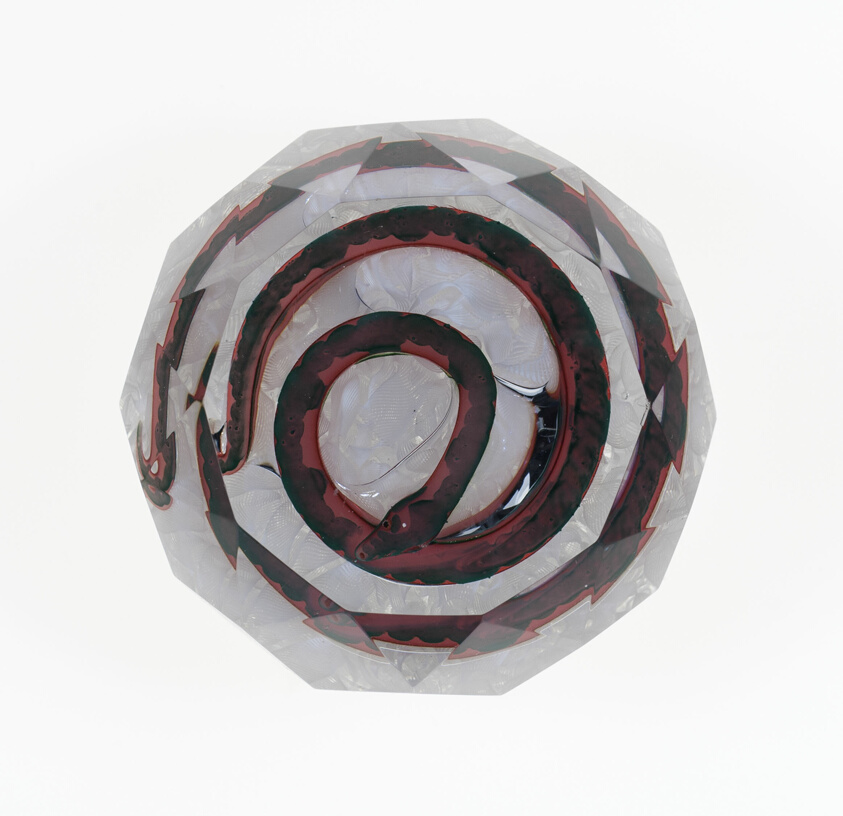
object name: Glass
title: Paperweight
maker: Saint-Louis Glassworks (Cristalleries de Saint-Louis); Lorraine, France, founded 1586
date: c. 1848–55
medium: Glass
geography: Saint-Louis-lès-Bitche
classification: paperweight; lampwork; european decorative arts; glass